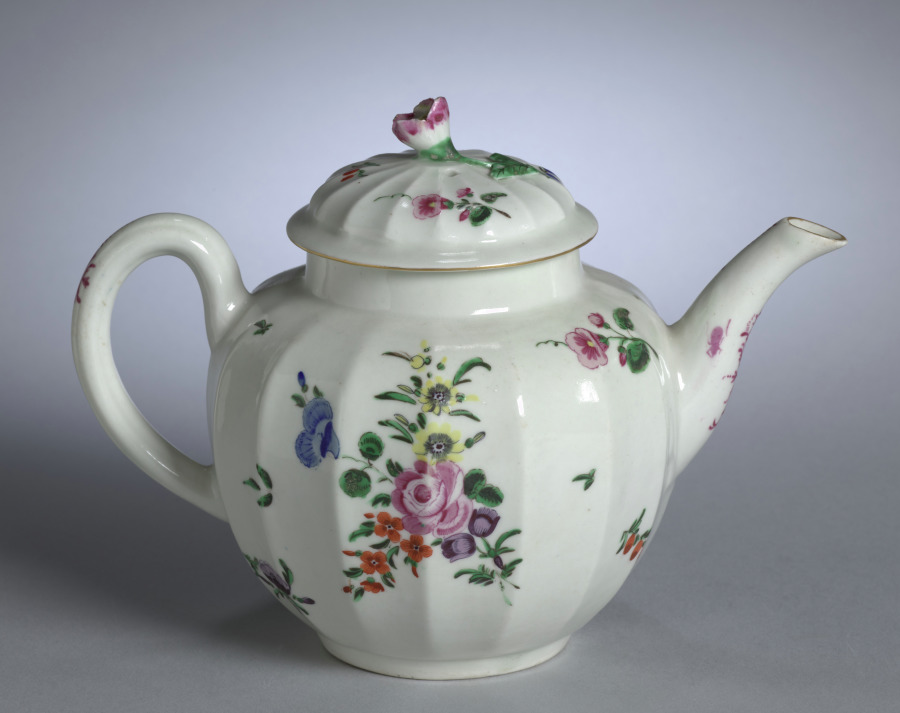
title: Teapot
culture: England, Worcester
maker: Worcester Porcelain Factory (British, established 1751)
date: c. 1755–75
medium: porcelain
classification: Ceramic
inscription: Mark on the bottom - An X with radiating lines inside a box.